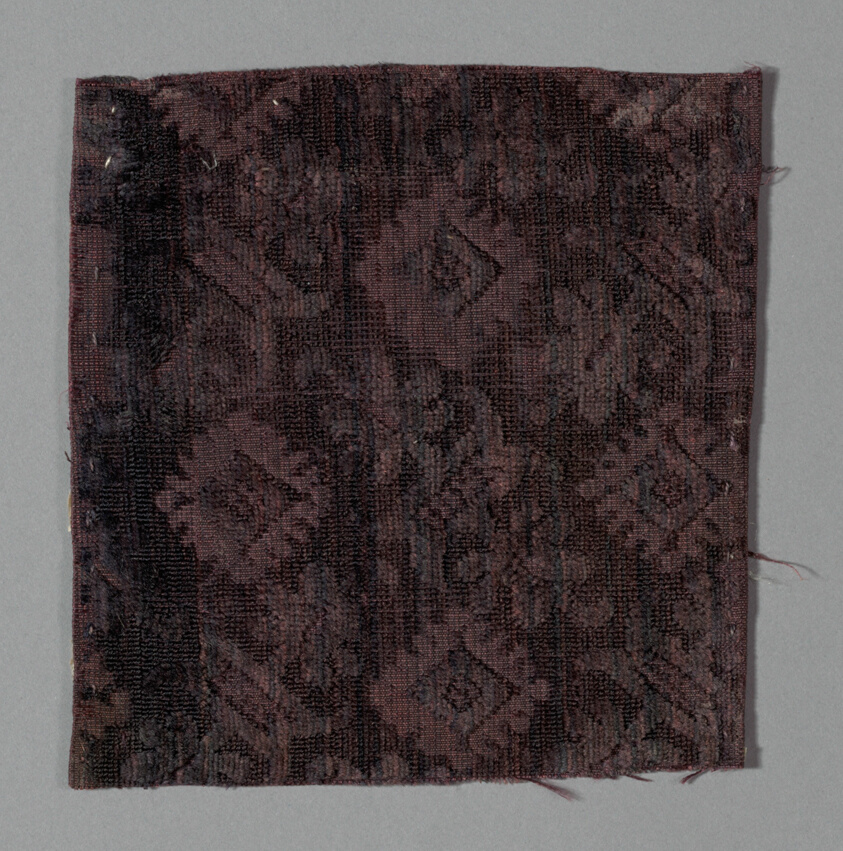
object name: Textile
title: Fragment (Dress Fragment)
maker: Italy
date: 17th century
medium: Silk, velvet; cut and uncut; plain weave foundation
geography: Italy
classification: textile; weaving - velvet; weaving